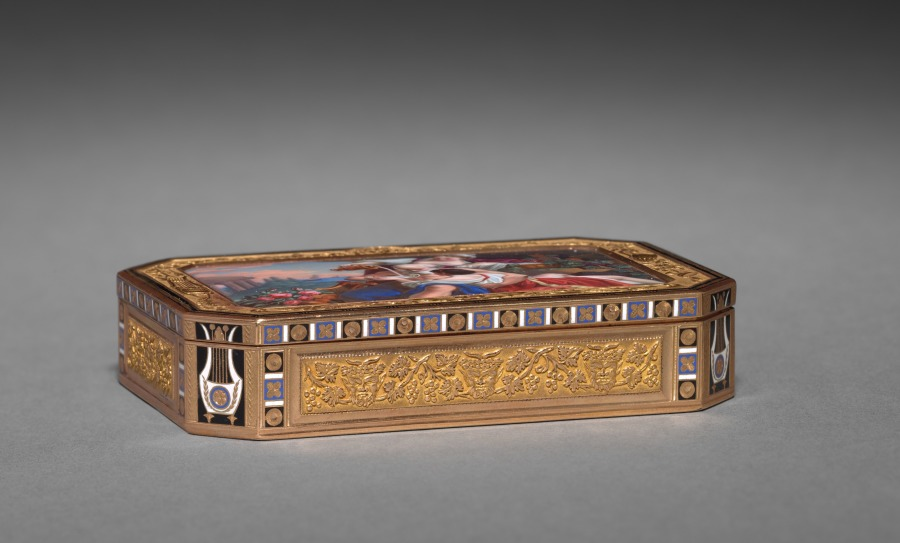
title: Box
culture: Switzerland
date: early 1800s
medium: gold and enamel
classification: Enamel